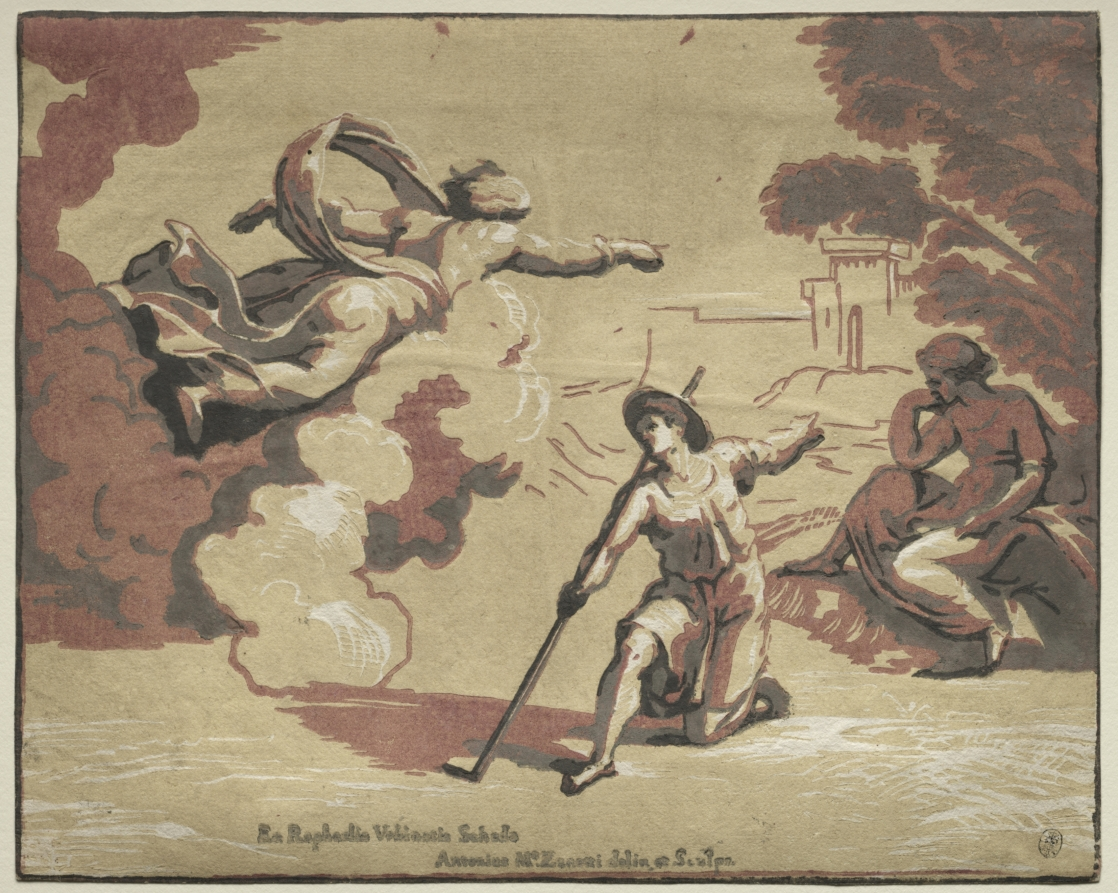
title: God Appearing to Isaac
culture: Italy, 18th century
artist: Antonio Maria I Zanetti (Italian, 1680–1757)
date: 1723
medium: chiaroscuro woodcut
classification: Print